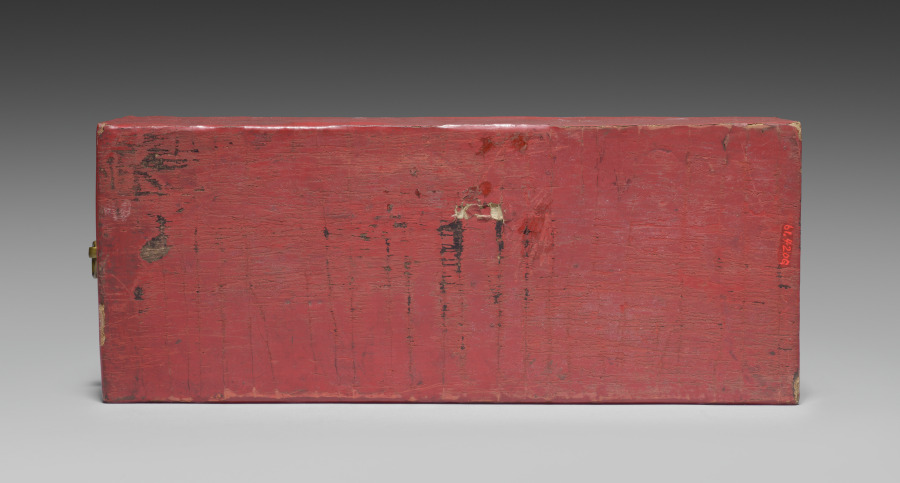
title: Drawer for a Tihong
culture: China, Ming dynasty (1368-1644), Wanli reign (1572-1620)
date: 1585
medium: carved cinnabar lacquer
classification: Lacquer